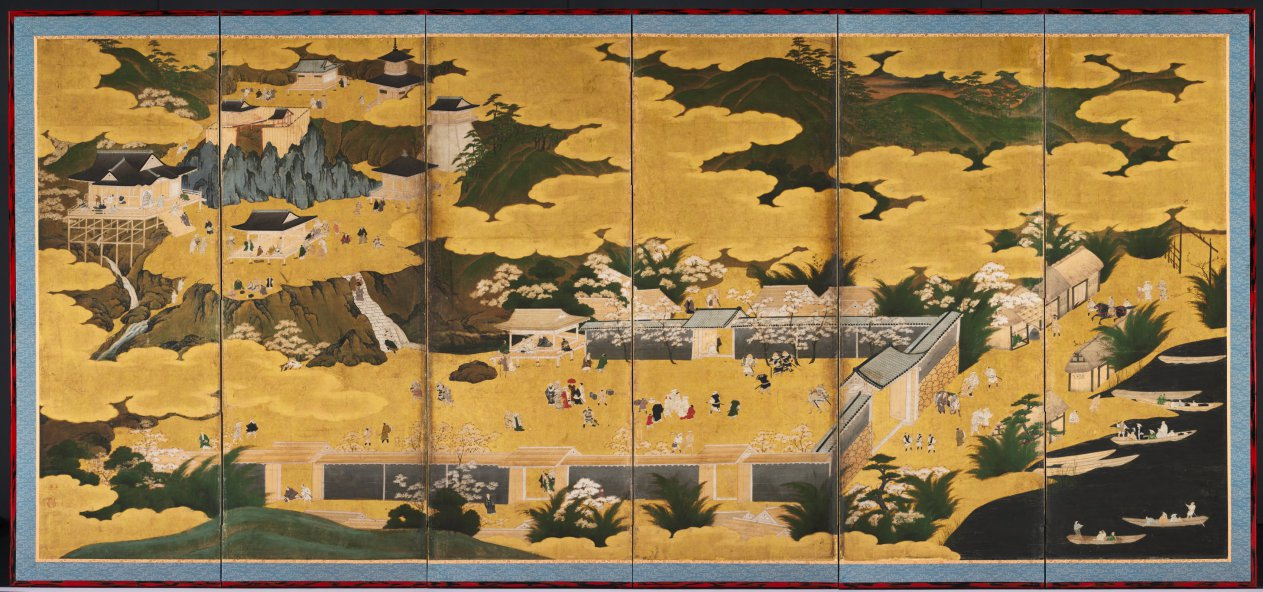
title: Famous Views of Ōmi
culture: Japan, Edo period (1615–1868)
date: 1660s–90s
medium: One of a pair of six-panel folding screens; ink, color, and gold on gilded paper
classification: Painting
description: Ōmi is an area around Lake Biwa near Kyoto. The Shinto shrine Hiyoshi Taisha and the Buddhist temple Ishiyamadera are in the upper right and upper left of the composition, respectively. At center is the pilgrimage route and people in the town before the temple gates. Harvested rice fields to the right and flowering cherry blossom trees at left show seasonal change from winter to spring.